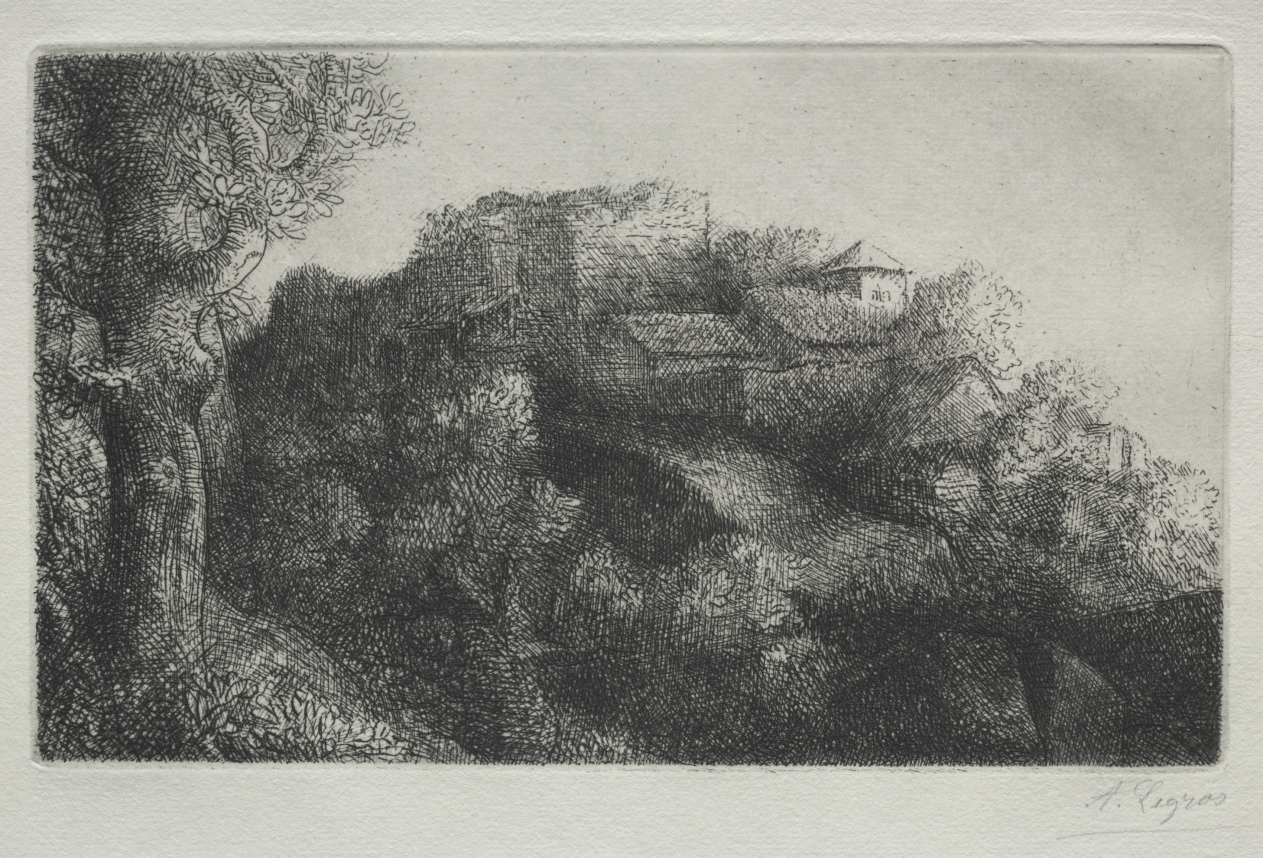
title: Landscape (with buildings)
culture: France, 19th century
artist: Alphonse Legros (French, 1837–1911)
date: c. 1857–1911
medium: etching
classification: Print